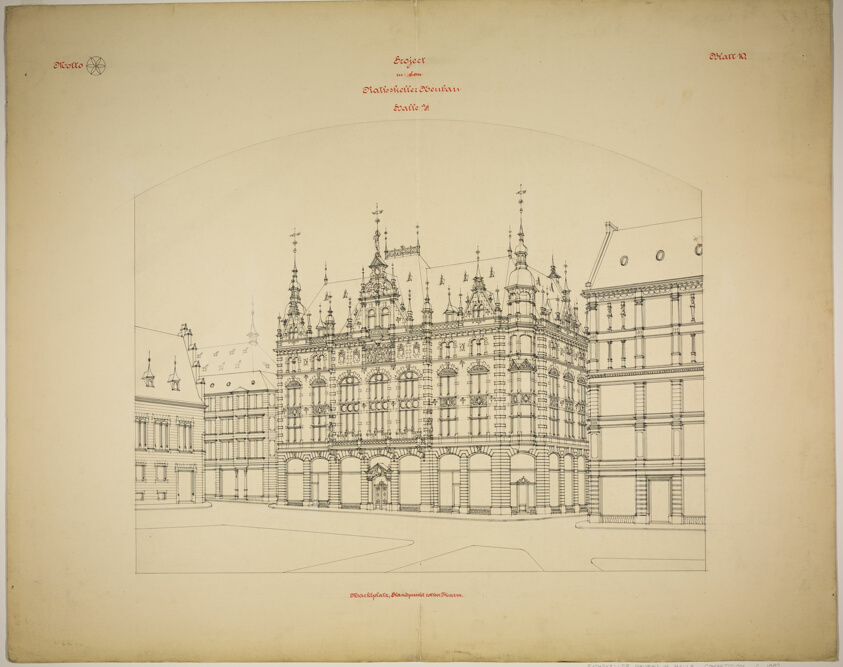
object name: Architectural Drawing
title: Rathskeller Neubau, Halle (Saale), Saxony-Anhalt, Germany, Perspective (unfinished)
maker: Peter J. Weber; American, born Germany, 1863-1923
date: c. 1887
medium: Graphite, ink, watercolor, and tempera on paper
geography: Saxony-Anhalt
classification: design drawing; architectural drawing